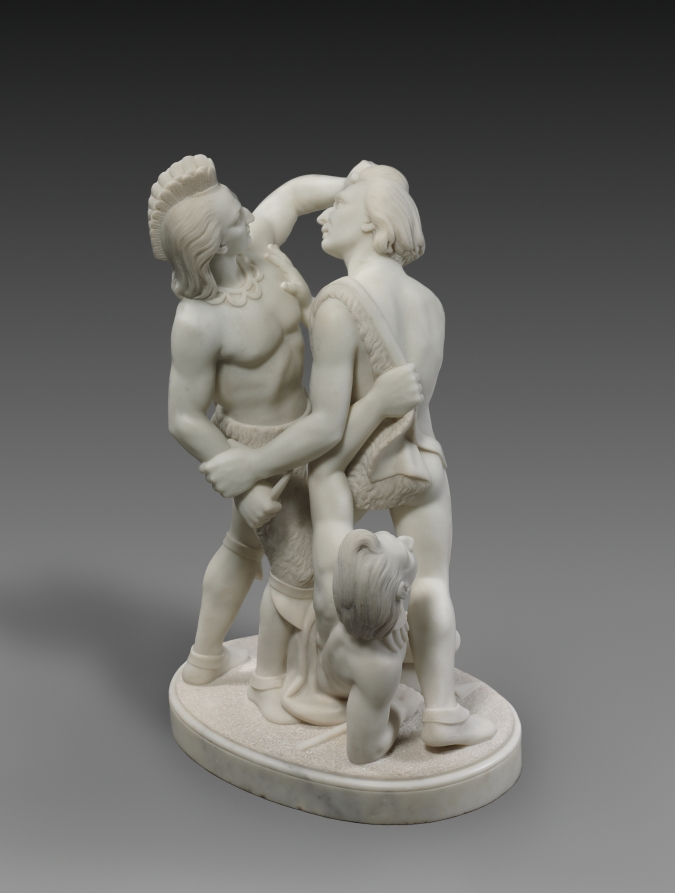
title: Indian Combat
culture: America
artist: Edmonia Lewis (American, c. 1844–1907)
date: 1868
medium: marble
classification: Sculpture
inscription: The base of the sculpture is inscribed: "EDMONIA LEWIS / FECIT A ROME 1868"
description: A spiraling composition with three intertwined figures, Indian Combat ranks as Edmonia Lewis’s most dynamic and complex creation. Although her Native American subjects typically exist in multiple versions, this example appears to be unique. Of Indigenous (Ojibwe) and African American ancestry, Edmonia Lewis studied at Oberlin College and apprenticed with a sculptor in Boston before moving to Rome in 1866. Her sculptures were readily purchased by patrons on both sides of the Atlantic.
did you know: Growing up in her Ojibwe community, Lewis went by a name that translates as "Wildfire."